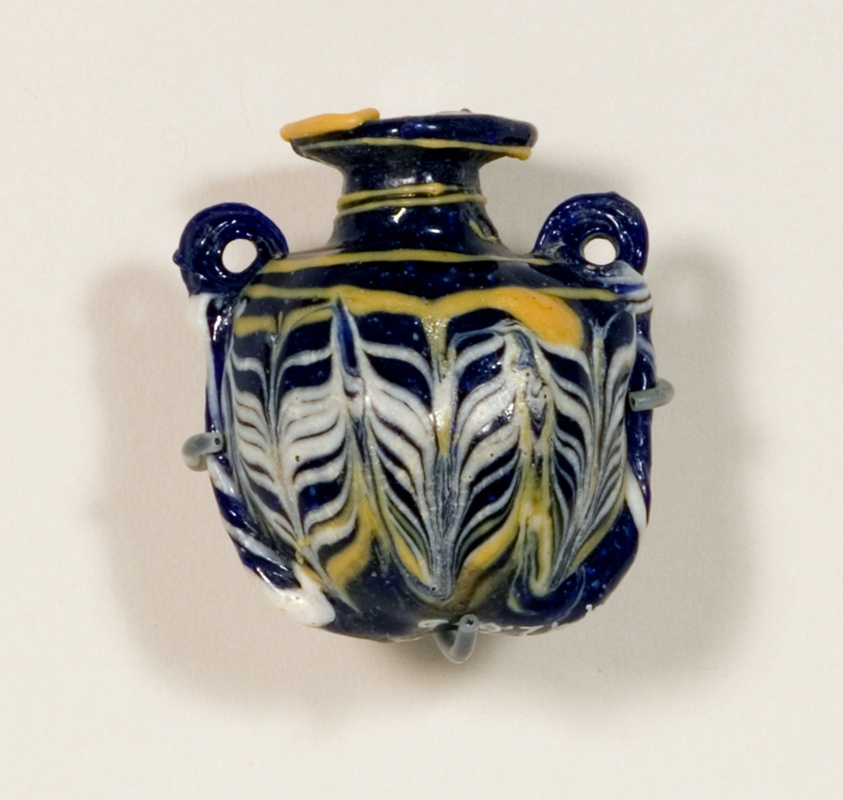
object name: Vessel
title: Lentoid Aryballos (Container for Oil)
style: late period (egyptian)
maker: Eastern Mediterranean or Italian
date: 4th-3rd century BCE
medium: Glass, core-formed technique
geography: Eastern Mediterranean Region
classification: vessel; glass; ancient art